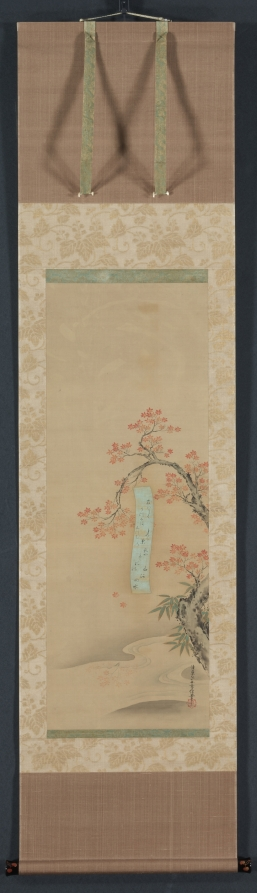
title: Autumn in Takao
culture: Japan, Edo period (1615–1868)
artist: Kiyohara Yukinobu (Japanese, 1643–1682)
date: late 1600s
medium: hanging scroll; ink and color on silk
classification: Painting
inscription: 款記「清原氏女雪信筆」/「清原女」朱文八角印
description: Kiyohara Yukinobu, a native of Kyoto, studied with Kano Tan'yū (1602–1674), the artist-in-residence to the shogun (military ruler) whose official residence was in Edo (Tokyo). Tan'yū traveled extensively because he bore responsibility for the decorative schema and large mural painting programs of the shogunal castles and residences in Nagoya and Kyoto. These were very large projects, requiring the services of legions of craftsmen, including Tan'yū's painting studio. Following her apprenticeship with Tan'yū, Kiyohara established her own career, which featured classical literary themes of the Heian era (10th–12th centuries). This image is set in autumn, and the poem card attached to the maple tree likely signifies the passage of a love affair. Takao is a popular scenic area in the mountains north of Kyoto, where autumn and spring foliage attracts many visitors.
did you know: Kiyohara Yukinobu was one of Japan's earliest and most talented female painters.